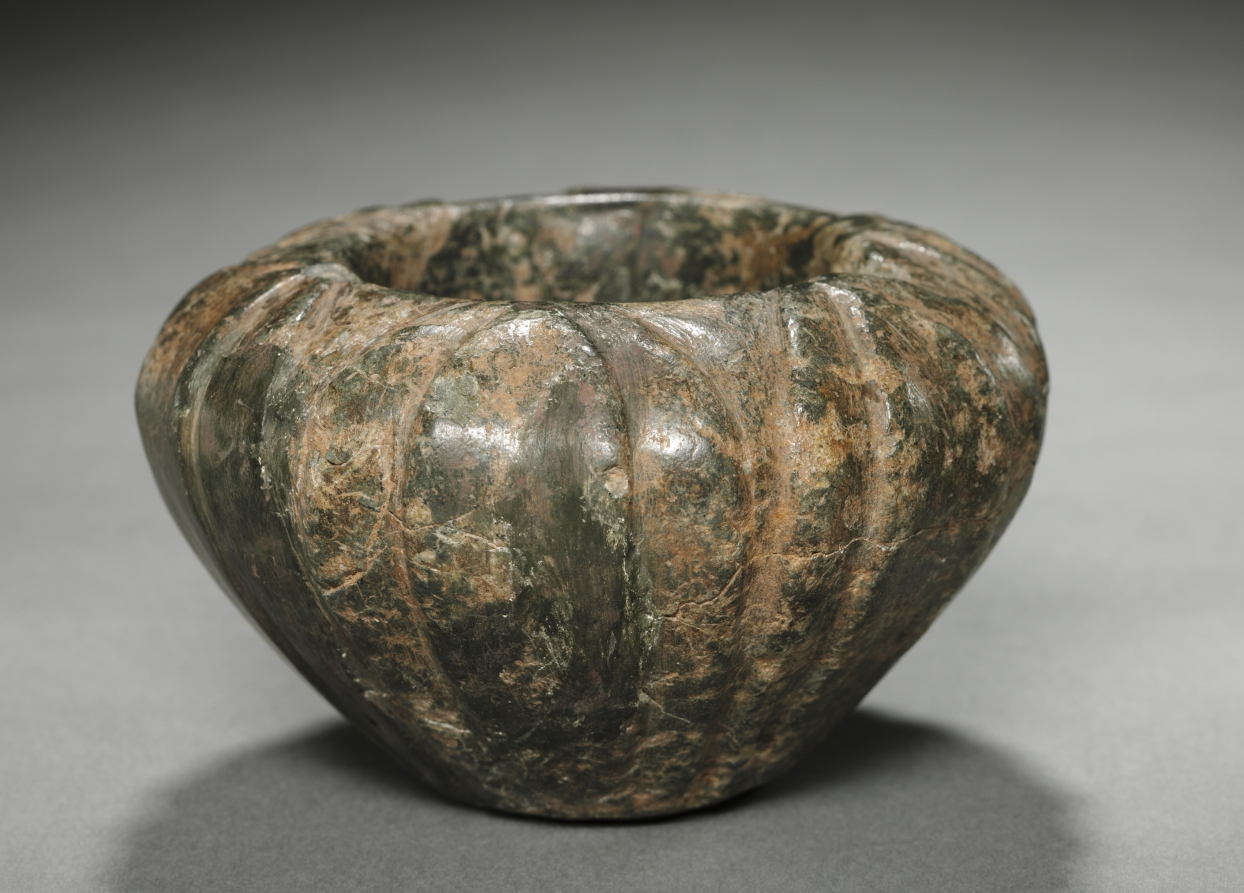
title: Minoan Petal Bowl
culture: Crete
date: 1600–1500 BCE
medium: stone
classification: Stone